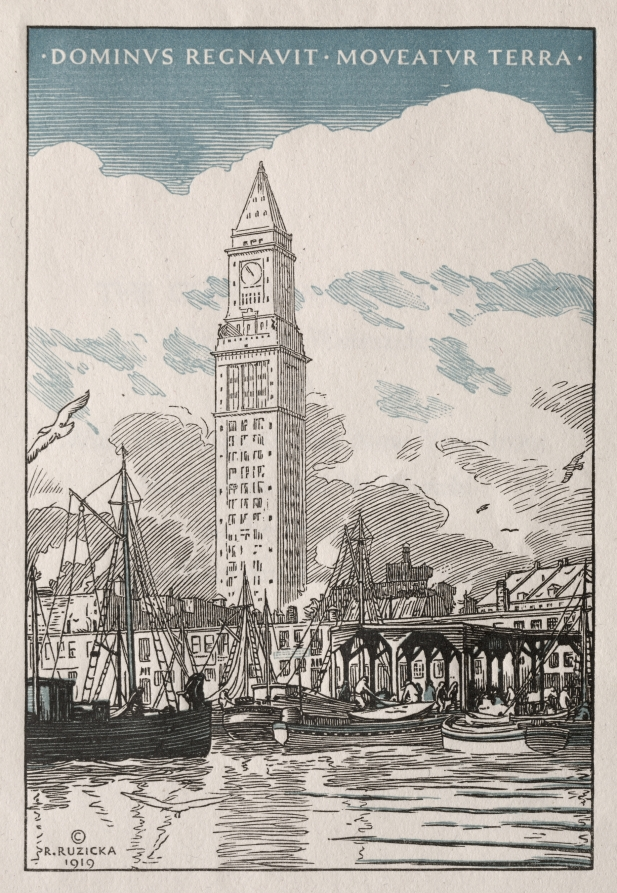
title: The Custom House Tower from the Waterside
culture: America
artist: Rudolph Ruzicka (American, born Bohemia, 1883–1978)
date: 1919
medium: chiaroscuro woodcut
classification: Print